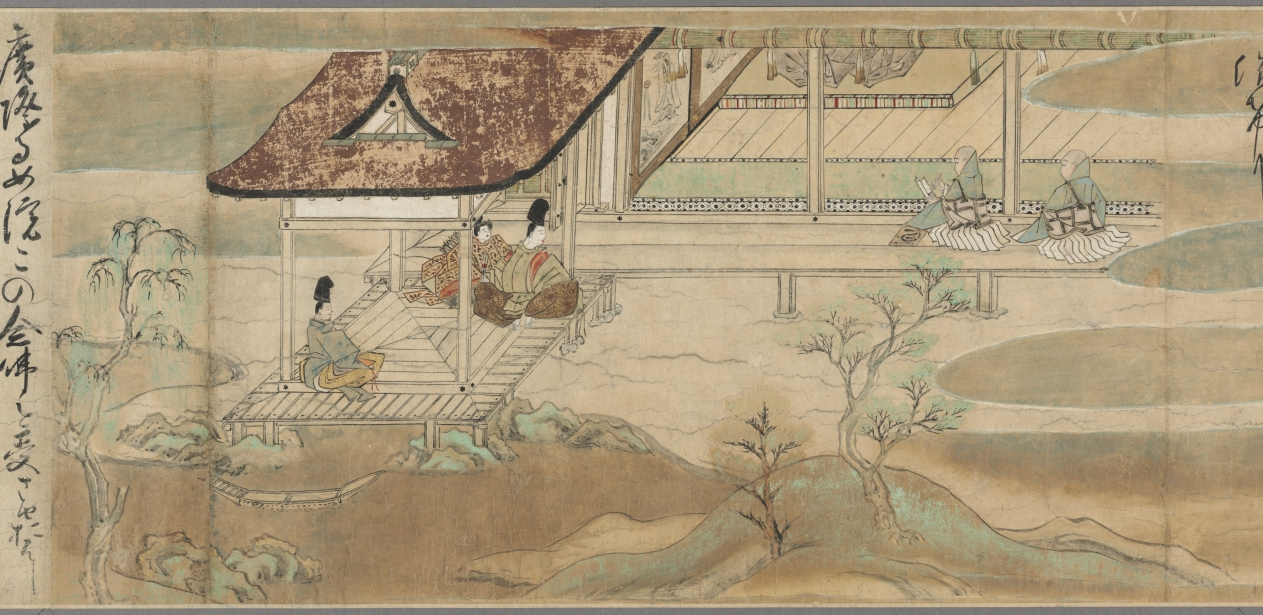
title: The Illustrated Miraculous Origins of the Yūzū Nenbutsu School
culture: Japan, Kamakura period (1185–1333)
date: early 1300s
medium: Handscroll; ink, color, and gold on paper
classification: Painting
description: This painting is the second of a set of two illustrated handscrolls. The first scroll depicts the biography of the Japanese Buddhist monk Ryōnin. This scroll begins with scenes of Ryōnin’s death and relates episodes illustrating the efficacy of following his teachings. Ryōnin asserted the total interconnectedness of all things and the spiritual benefit of chanting the name of the Buddha Amida for one another.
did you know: The other scroll from this two-scroll set belongs to the Art Institute of Chicago.